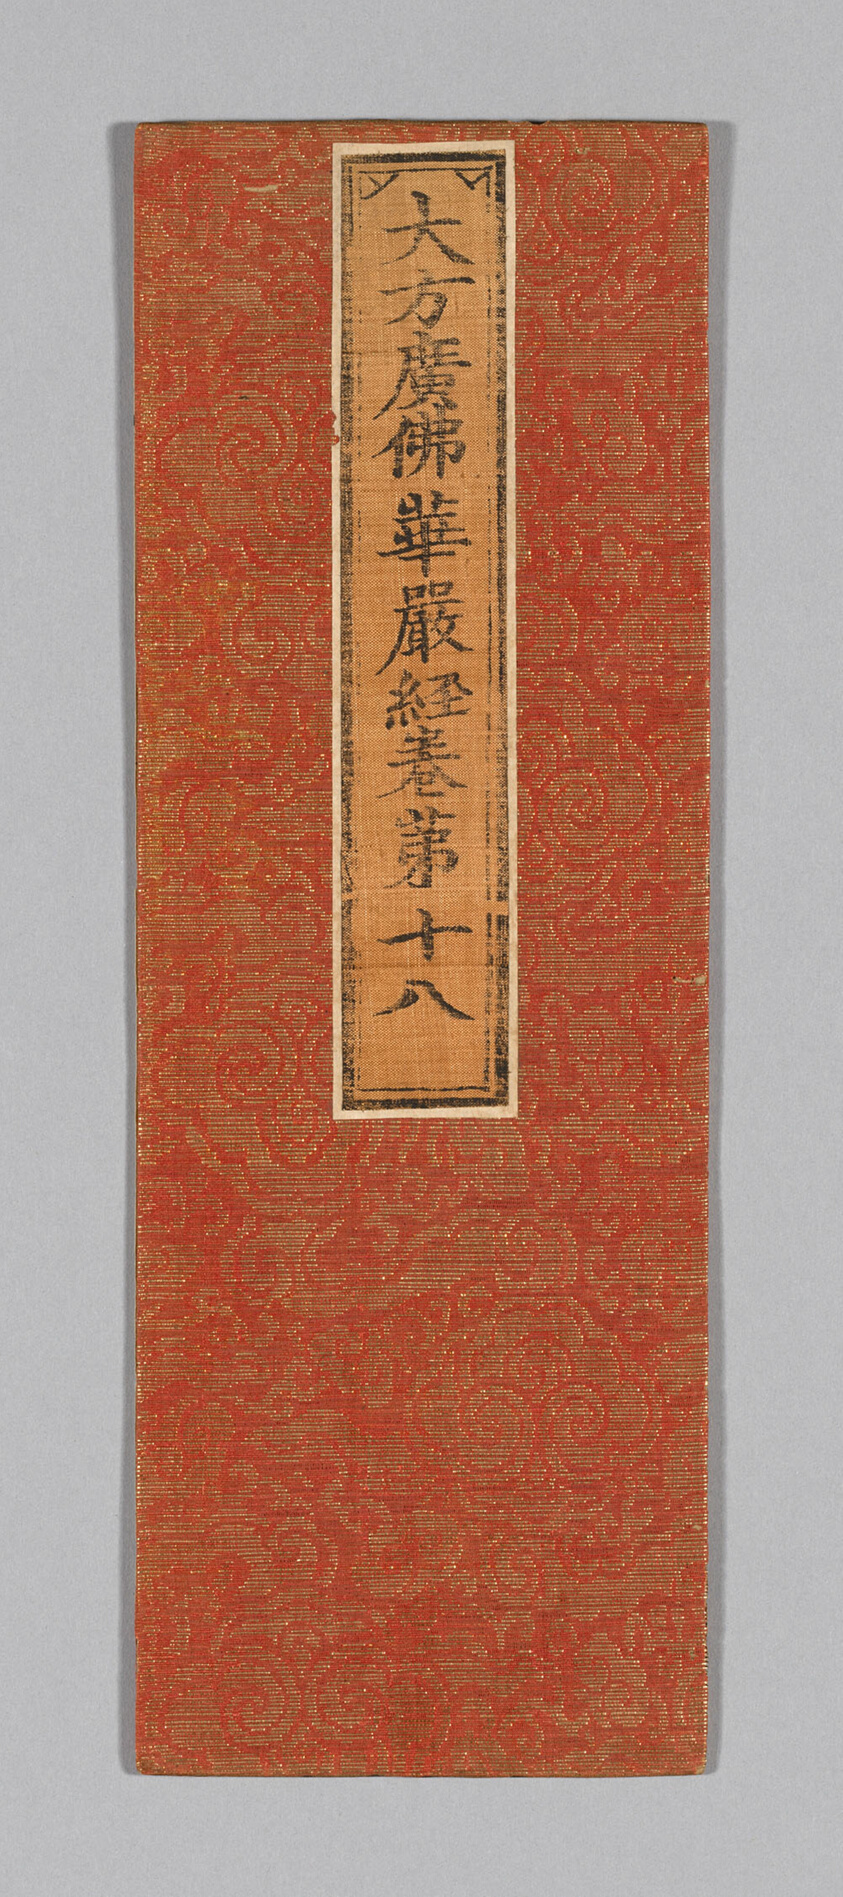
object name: Textile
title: Sutra Cover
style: ming, Chinese (culture or style), East Asian, asian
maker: China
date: Ming dynasty (1368–1644), c. 1590's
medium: Silk and gold-leaf-over-lacquered-paper strips, gauze weave with supplementary patterning wefts; label: silk, plain weave; painted with ink; over paper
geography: China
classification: textile; weaving